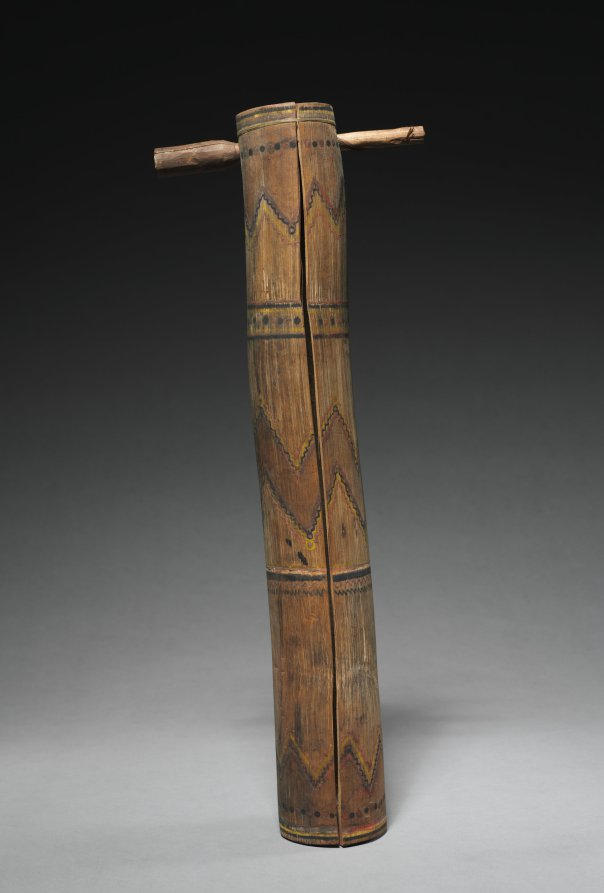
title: Fiddle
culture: America, North American Indian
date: 20th century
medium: wood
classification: Musical Instrument